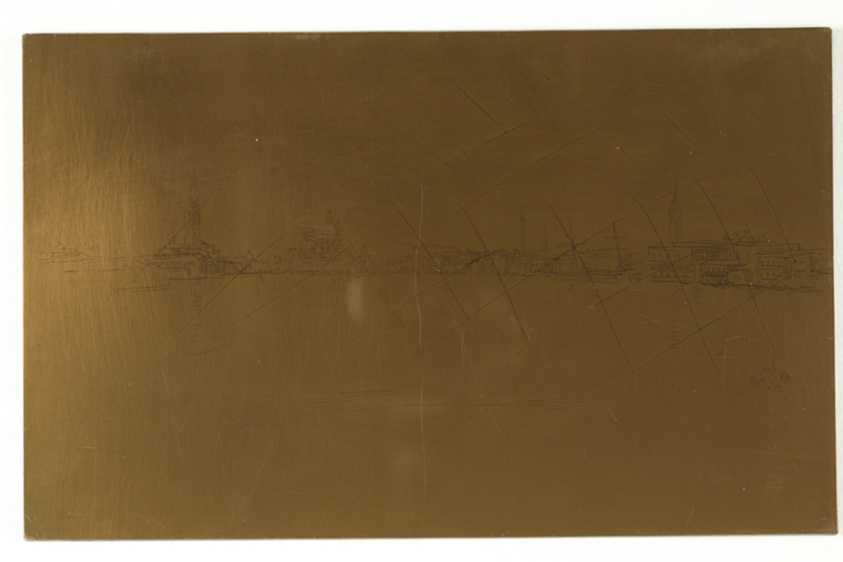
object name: Print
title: Salute Dawn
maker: James McNeill Whistler (American, 1834-1903)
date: 1879/80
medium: Cancelled copper plate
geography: United States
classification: copper plate; prints and drawing; matrix; etched plate; print